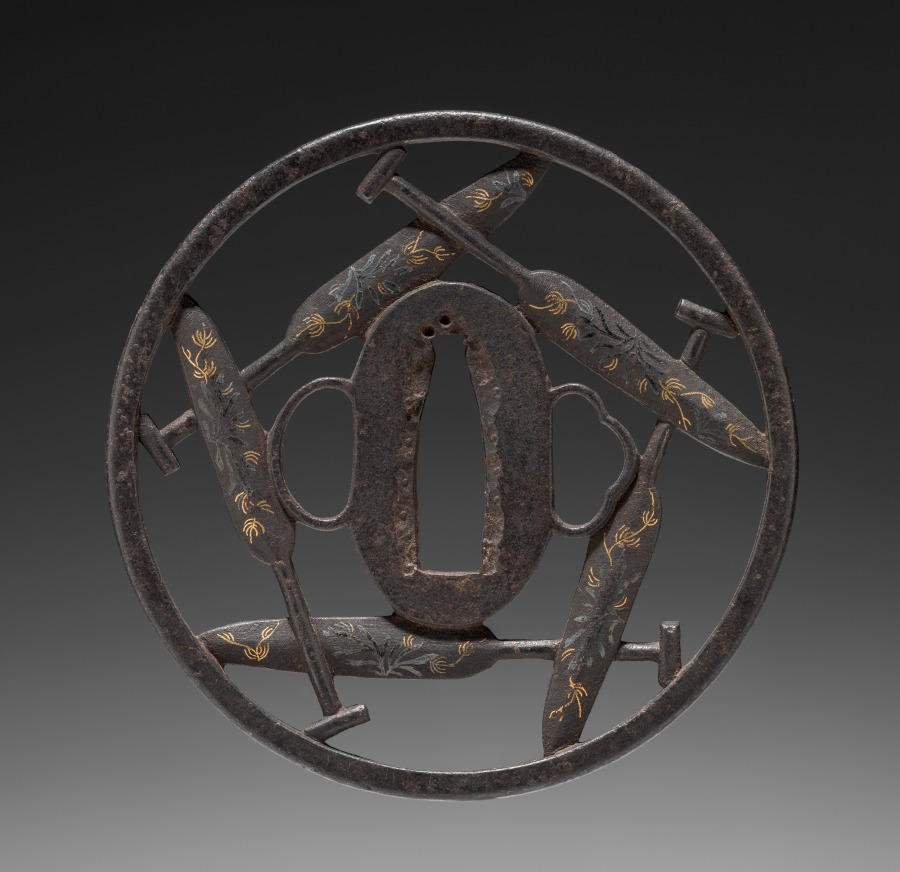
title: Sword Guard (Tsuba)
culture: Japan, possibly Edo period (1615-1868)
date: c. 1615–1868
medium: iron with gilt inlay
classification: Arms and Armor